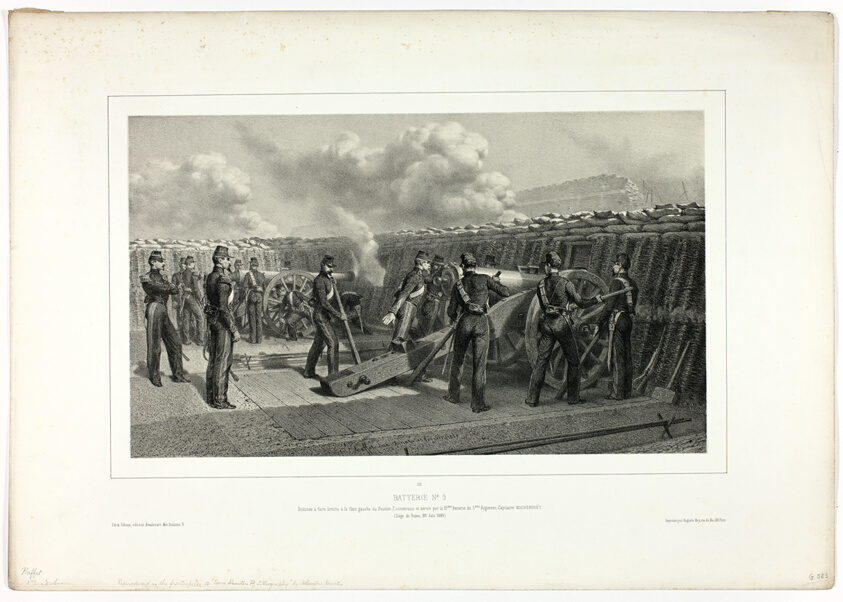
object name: Print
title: Battery no.9, from Souvenirs d’Italie: Expédition de Rome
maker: Denis Auguste Marie Raffet (French, 1804-1860); printed by Auguste Bry (French, 19th century); published by Chez Gihaut Frères (French, 19th century)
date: 1859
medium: Lithograph in black on warm ivory wove chine laid down on off-white wove paper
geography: France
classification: lithograph; print; prints and drawing